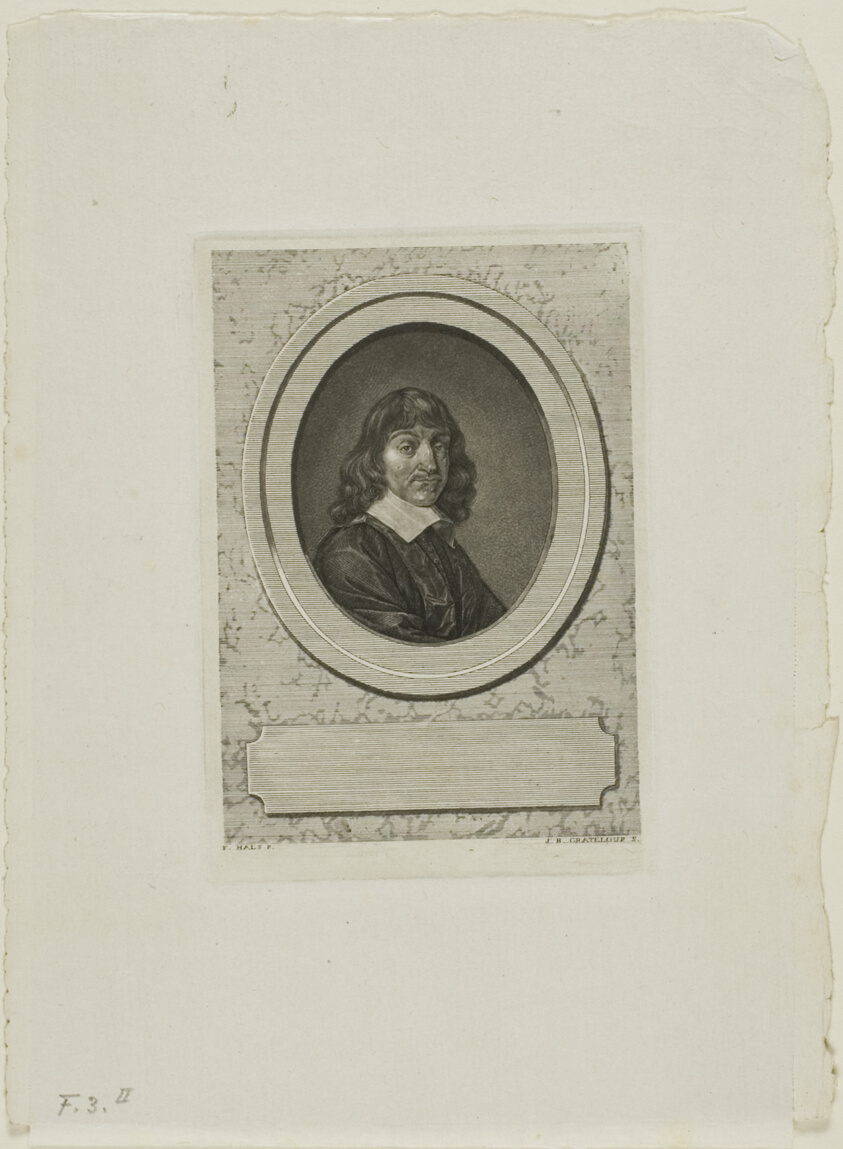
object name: Print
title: Descartes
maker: Jean-Baptiste de Grateloup (French, 1735-1817)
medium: Engraving on paper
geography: France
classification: engraving; print; prints and drawing